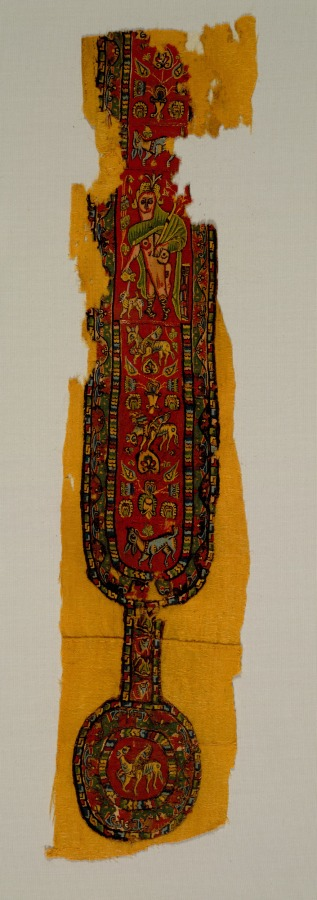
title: Clavi (Decorative Band)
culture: Egypt, Umayyad period (661–750) or Abbasid period (750–1258)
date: 700s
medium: wool; plain weave with slit-tapestry weave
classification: Textile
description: Figures and winged animals from ancient Greece and Rome remained popular during the early Islamic period of the Umayyad and Abbasid dynasties. The naked figure could represent Dionysus, the Greek god of wine; he holds his thyrsus, a staff decorated with ivy leaves and pinecones, while pouring liquid from a small jug for the panther. These colorful designs probably adorned the sleeve and front or back of a tunic, a garment worn directly on the body for over 1,000 years, from Roman antiquity to the Middle Ages. Popular decorations were regularly reused and sewn onto new tunics, as can be seen on this winter garment made of wool.